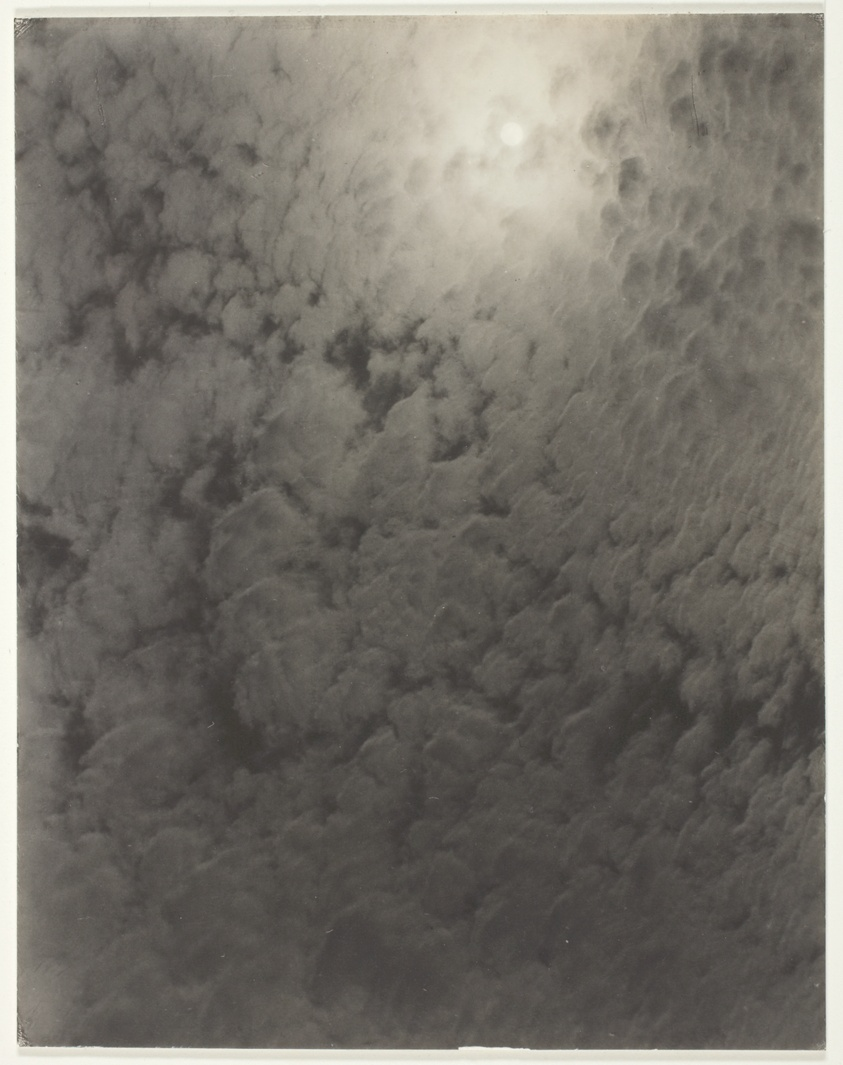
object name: Photograph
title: Equivalent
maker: Alfred Stieglitz (American, 1864–1946)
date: 1926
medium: Gelatin silver print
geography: United States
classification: gelatin silver (developing-out-paper) pr; photographic process; photography; photograph